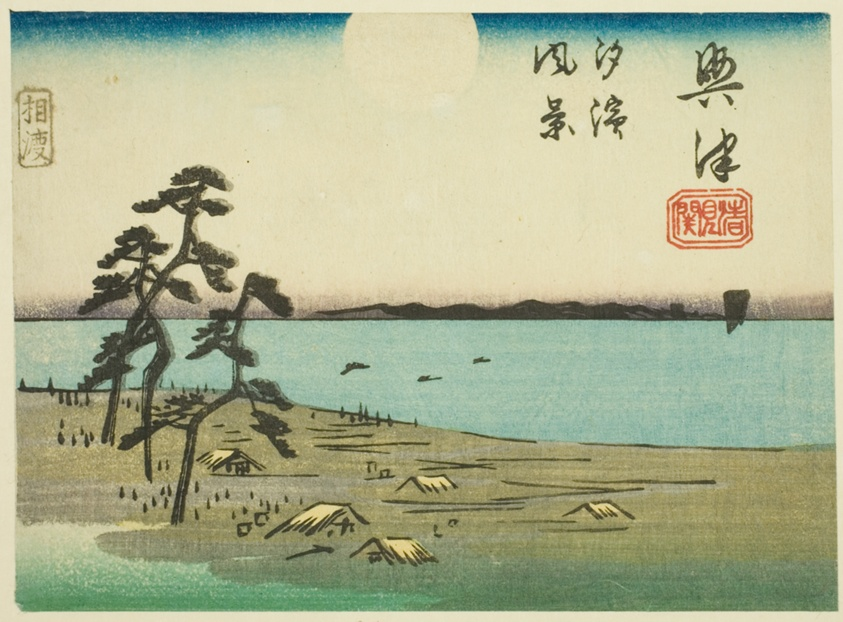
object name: Print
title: View of Shiohama and Kiyomigaseki in Okitsu (Okitsu, Kiyomigaseki, Shiohama fukei), section of sheet no. 4 from the series "Cutout Pictures of the Tokaido Road (Tokaido harimaze zue)"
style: Japanese (culture or style)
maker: Utagawa Hiroshige 歌川 広重; Japanese, 1797-1858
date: c. 1848/52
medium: Color woodblock print; section of harimaze sheet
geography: Japan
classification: woodblock print; print; asian art